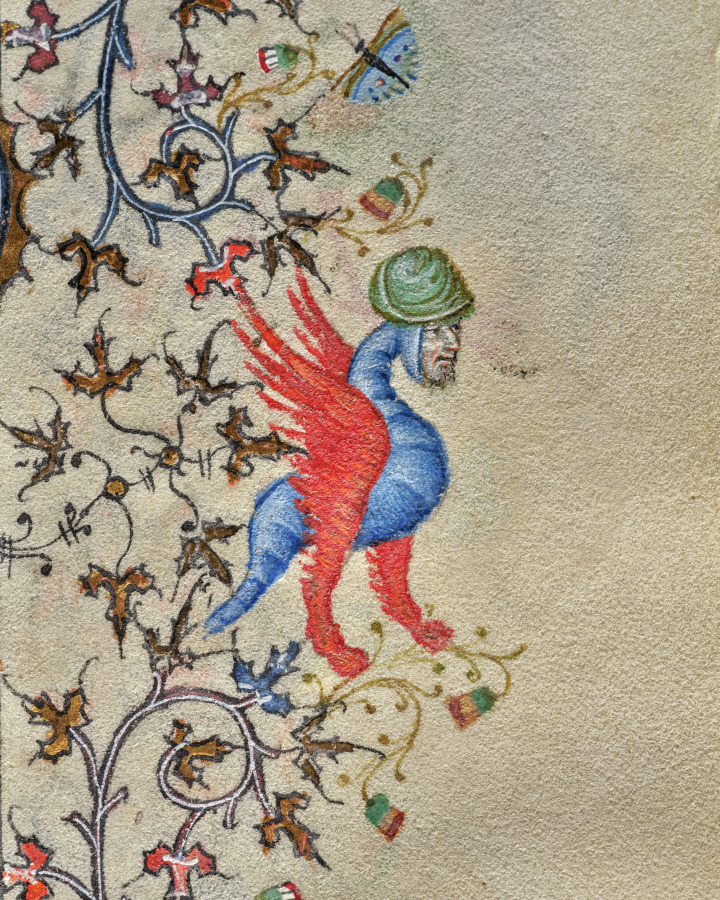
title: Hours of Charles the Noble, King of Navarre (1361-1425): fol. 282r, St. Thomas à Becket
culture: France, Paris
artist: Master of the Brussels Initials and Associates (French)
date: c. 1405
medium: ink, tempera, and gold on vellum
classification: Bound Volume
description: This precious volume was obviously highly prized by its owner, the French-born King of Navarre, who had his coat of arms painted on no less than twenty folios. Rather than directly commissioning this manuscript from a specific workshop, it seems that Charles the Noble acquired his book of hours -- perhaps ready-made for the luxury market -- while on a trip to Paris in 1404-05. A collaborative effort, six painting styles are evidenced within the pages of this codex, those of two Italians, two Frenchmen, and two Netherlanders. The painter who was responsible for the planning and decoration of the book, and who produced seventeen of the large miniatures, was a Bolognese artist known as the Master of the Brussels Initials. His principal assistant, responsible for most of the borders, was a Florentine who signed his name "Zecho" da Firenze on folio 208 verso.